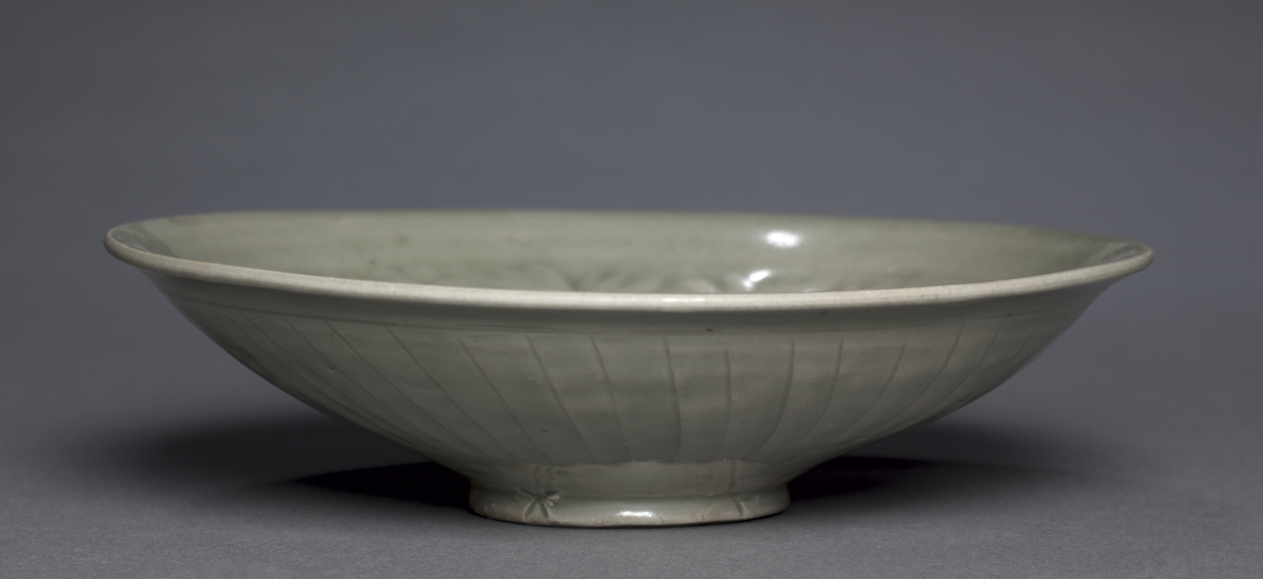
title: Bowl with Peonies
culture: China, Shaanxi province, Tongchuan, Huangbaozhen, Jin dynasty (1115-1234)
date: c. 1100s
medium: green-glazed stoneware with molded decoration, Yaozhou ware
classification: Ceramic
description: This type of pottery, called Yaozhou ware, is a type of celadon or greenware that is well-known for its distinctive molded decoration.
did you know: In East Asian art, peonies traditionally symbolize prosperity and wealth.